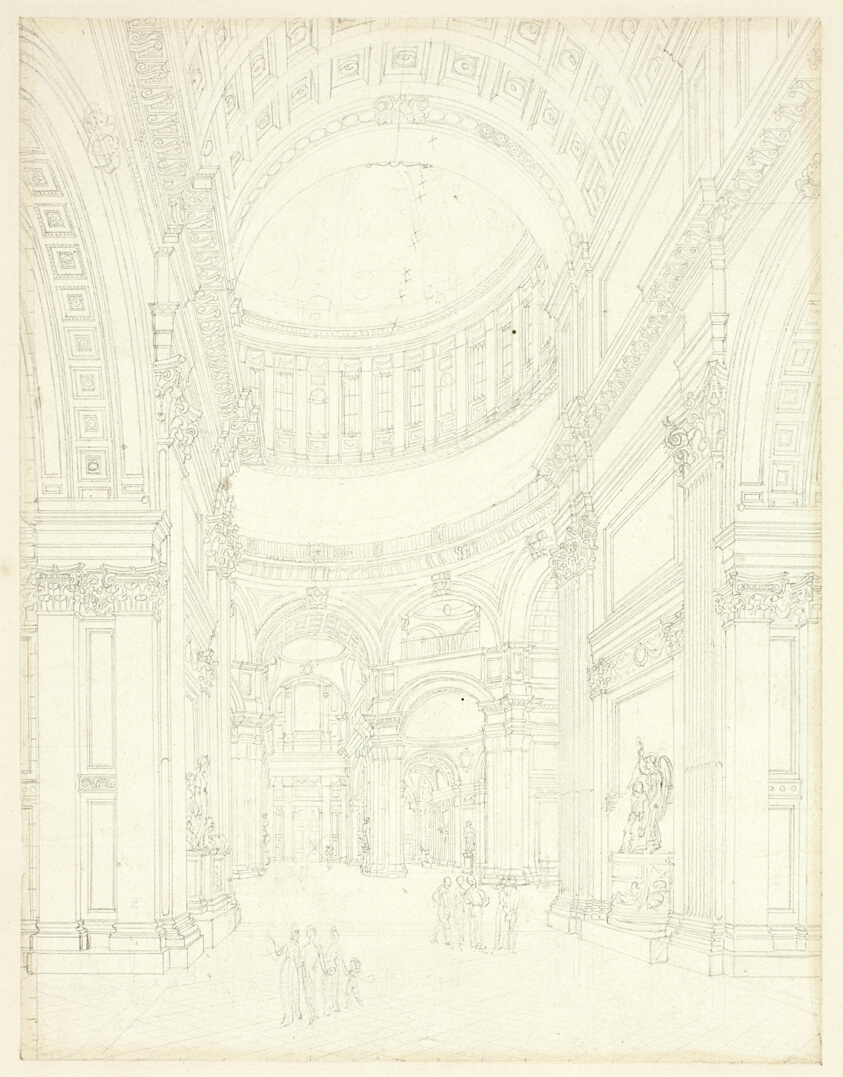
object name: Drawing and Watercolor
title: Study for St. Paul's Cathedral, from Microcosm of London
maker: Augustus Charles Pugin (English, born France, 1762-1832); Thomas Rowlandson (English, 1756-1827)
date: c. 1809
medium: Graphite on ivory wove paper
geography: England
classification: graphite; drawings (visual works); prints and drawing